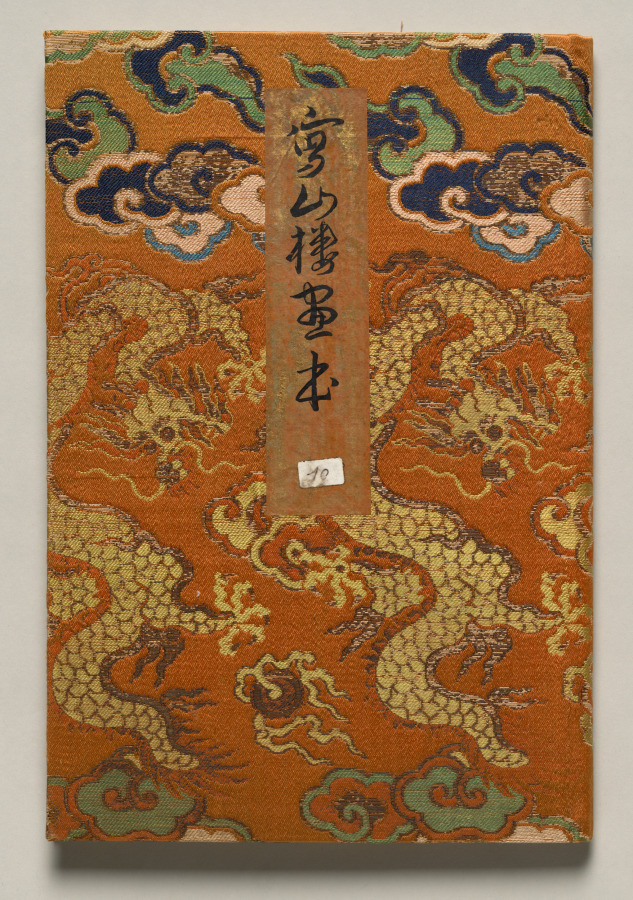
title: Shazanrō Picture Book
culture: Japan, Edo period (1615–1868)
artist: Tani Bunchō (Japanese, 1763–1841)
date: 1816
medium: Woodblock-printed book; ink and color on paper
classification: Bound Volume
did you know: Shazanrō was one of Tani Bunchō's style names.